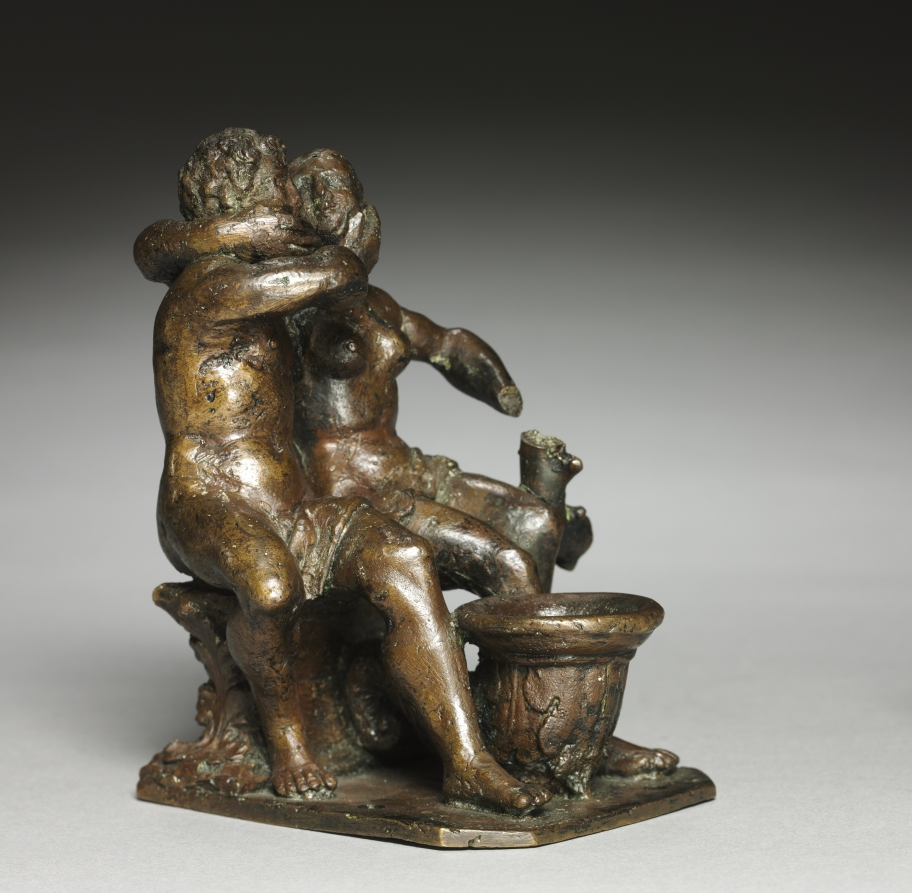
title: Adam and Eve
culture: Germany, Nuremberg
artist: workshop of Peter Vischer (German, 1487–1528)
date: c. 1520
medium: bronze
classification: Sculpture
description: The figures of Adam and Eve embrace on a bench. Together, the figures straddle an upright cornucopia that is meant to serve as an inkwell. The drapery strewn across the figures' laps—and thus covering their genitals—suggests that the scene takes place after the Fall. One can see a remnant of the Tree of Life to the right of Eve. Numerous bronze inkwells of the period survive, though they usually feature a single figure, usually allegorical, and not such an elaborate composition as seen here. This inkwell was formerly in the collection of the Duke of Arenberg, a noble house of the Habsburg Netherlands. The Vischers (Hermann I, Peter the elder, Hermann II, Peter the younger, Hans, Jakob, Paulus, and Georg) were the most renowned bronze casters of Renaissance Nuremberg, and had drawn patrons from across Europe. Because of certain ambiguities in its style, in the past the inkwell had been attributed to Georg Vischer. Stylistically, it resembles some of the miniature figures in Peter Vischer the younger's Shrine of St. Sebald (Church of St. Sebald, Nuremberg), portions of which had been cast at approximately the same time. South German bronze foundries in the sixteenth century would often adapt stylistic elements of Venetian bronzes to suit local tastes, and this inkwell is a product of this phenomenon.